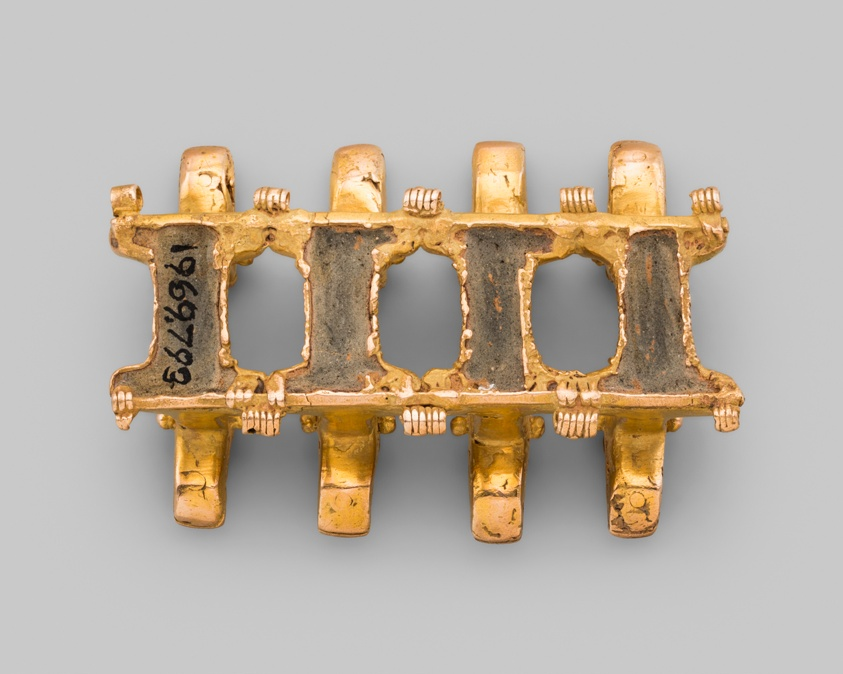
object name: Costume and Accessories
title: Pendant in the Form of Four Double-Headed Figures with Long Beaks, Possibly Ducks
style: coclé, Pre-Columbian, americas, Arts of the Americas, lower central america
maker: Coclé (Venado Beach, Coclé province, Panama)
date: 500–1000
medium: Cast gold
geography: Panama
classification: pendant (jewelry); metal; jewelry; art of the americas; costume